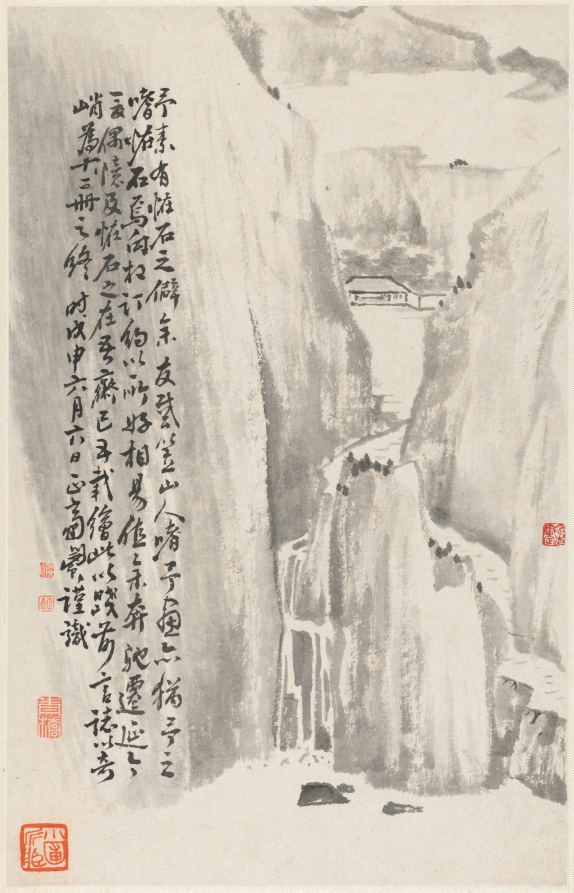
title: Sheer Cliffs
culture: China, Qing dynasty (1644-1911)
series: Album of Miscellaneous Subjects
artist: Min Zhen (Chinese, 1730–after 1788)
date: 1788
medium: album leaf, ink on paper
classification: Painting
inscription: 予素有怪石之僻。余友戴笠山人嗜予畫，亦猶予之嗜怪石焉。向故訂約，以所好相易。值余奔馳遷延，今夏偶憶及怪石之在吾齋已五載。繪此以踐前言。誌以奇峭為十二冊之終。時戊申六月六日，正齋閔貞謹識。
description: Min Zhen, who was orphaned at age 12 and developed an eccentric personality, was trained by Tang Yin (1682–1756), a writer, playwright, and superintendent of the imperial porcelain workshops in Jingdezhen. The connection to him may have enabled Min to stay in Beijing for a decade from around 1773. It is not clear whether he ever resided in Yangzhou, but his style is in many instances reminiscent of that of Yangzhou artist Huang Shen. This album demonstrates Min’s versatility and mature style in the last years of his life.